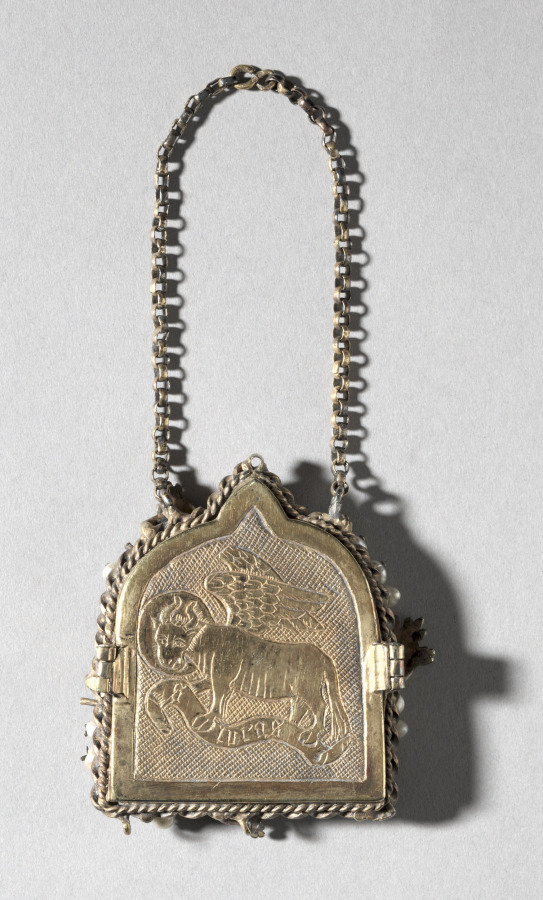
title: Frame with Winged Bull of Saint Luke on the back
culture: Germany, Aachen, Byzantine period, 14th century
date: mid-1300s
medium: gilt silver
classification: Metalwork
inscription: inscribed on the front of the frame: HANC IMAGINEM FECIT S. LUCAS EV. AD SIMILITUDINEM B. M. V.; inscribed on the back, directly below the winged bull: LUKAS.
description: This small-scale Byzantine icon depicts a half-length figure of the Virgin holding the Christ child. When the icon was mounted in its present frame by a German artist in the 14th century, it was considered to be an authentic portrait painted by Saint Luke. This claim, made in an inscription on the frame, is further emphasized by the ox, Saint Luke’s symbol, engraved on the frame’s reverse.